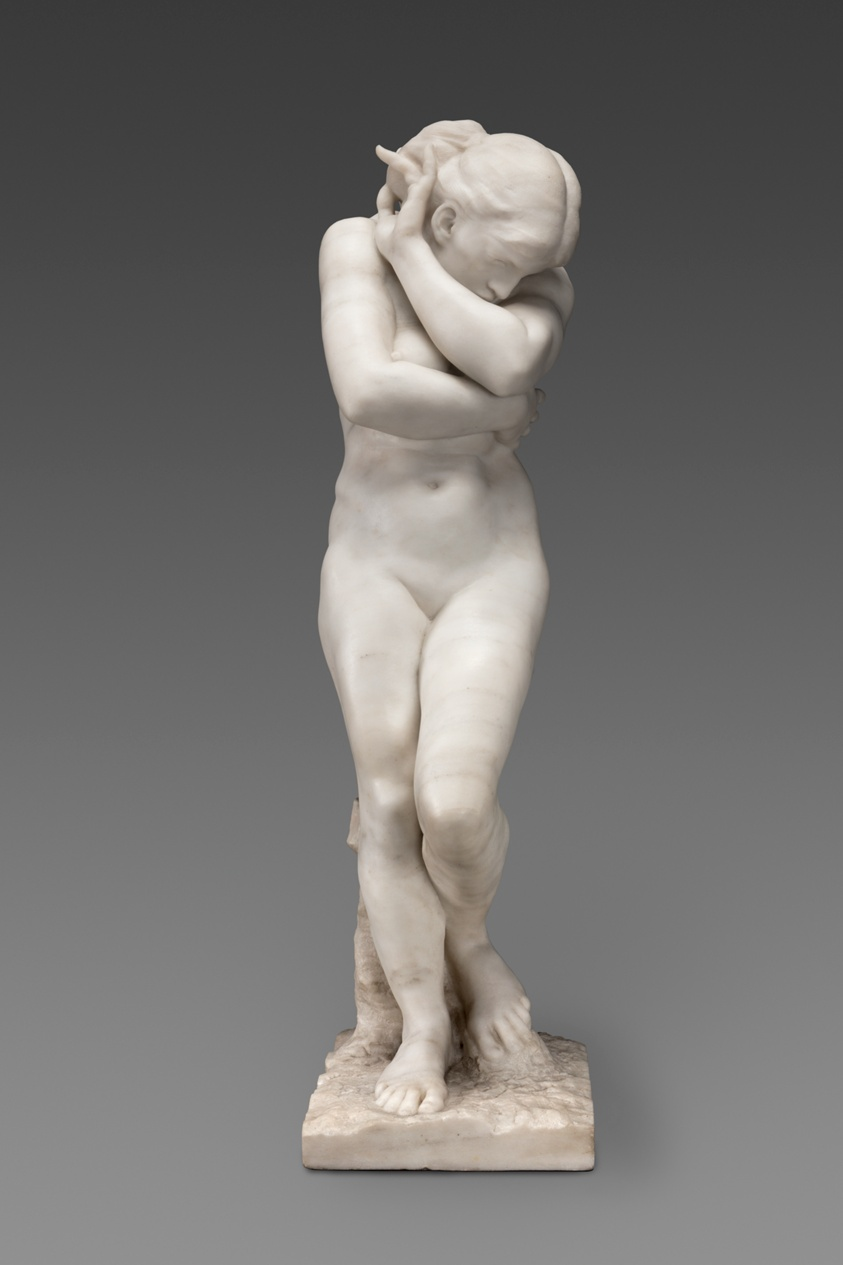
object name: Sculpture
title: Eve after the Fall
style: nineteenth century, 19th century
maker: Auguste Rodin (French, 1840–1917)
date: Modeled 1883, carved c. 1886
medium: Marble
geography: France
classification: statuette; sculpture; figure; french; marble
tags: Eve (Biblical), nudes, woman, genesis, religious figures, figure, biblical, religion